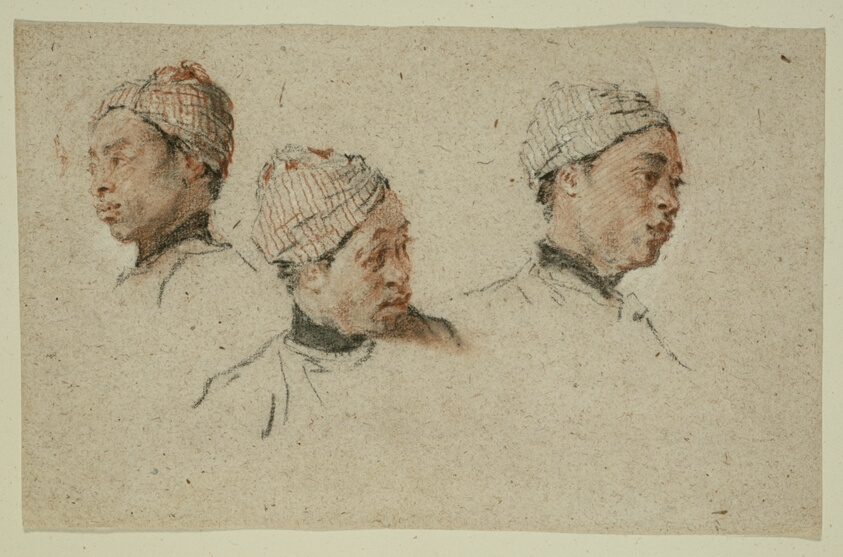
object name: Drawing and Watercolor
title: Three Studies of the Head of a Turbaned Black Man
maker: Nicolas Lancret (French, 1690-1743)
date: 1720/30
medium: Black, red and white chalks on oatmeal laid paper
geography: France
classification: chalk; drawings (visual works); prints and drawing